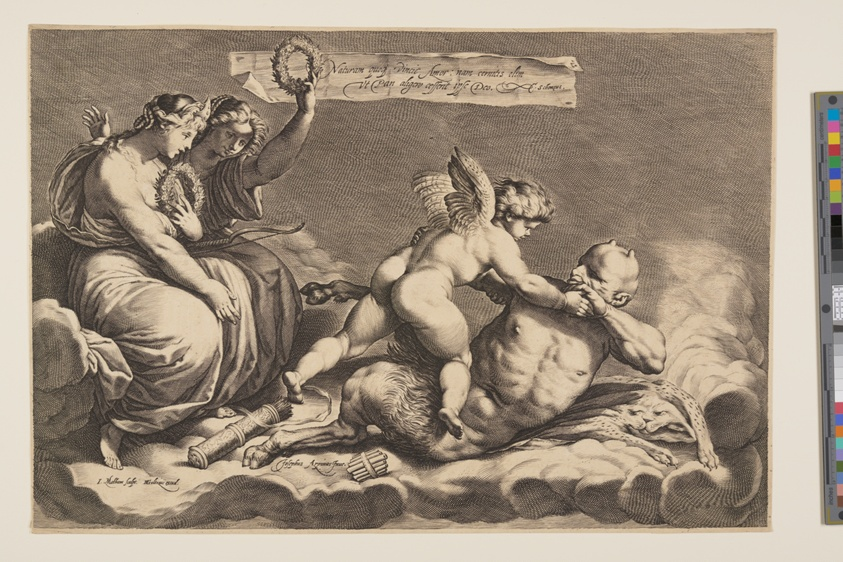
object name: Print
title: Cupid Taming Pan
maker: Jacob Matham (Dutch, 1571–1631); after Giuseppe Cesari, Il Cavaliere d’Arpino (Italian, 1568-1640)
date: c. 1600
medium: Engraving on ivory laid paper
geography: Netherlands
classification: print; paper; prints and drawing; engraving